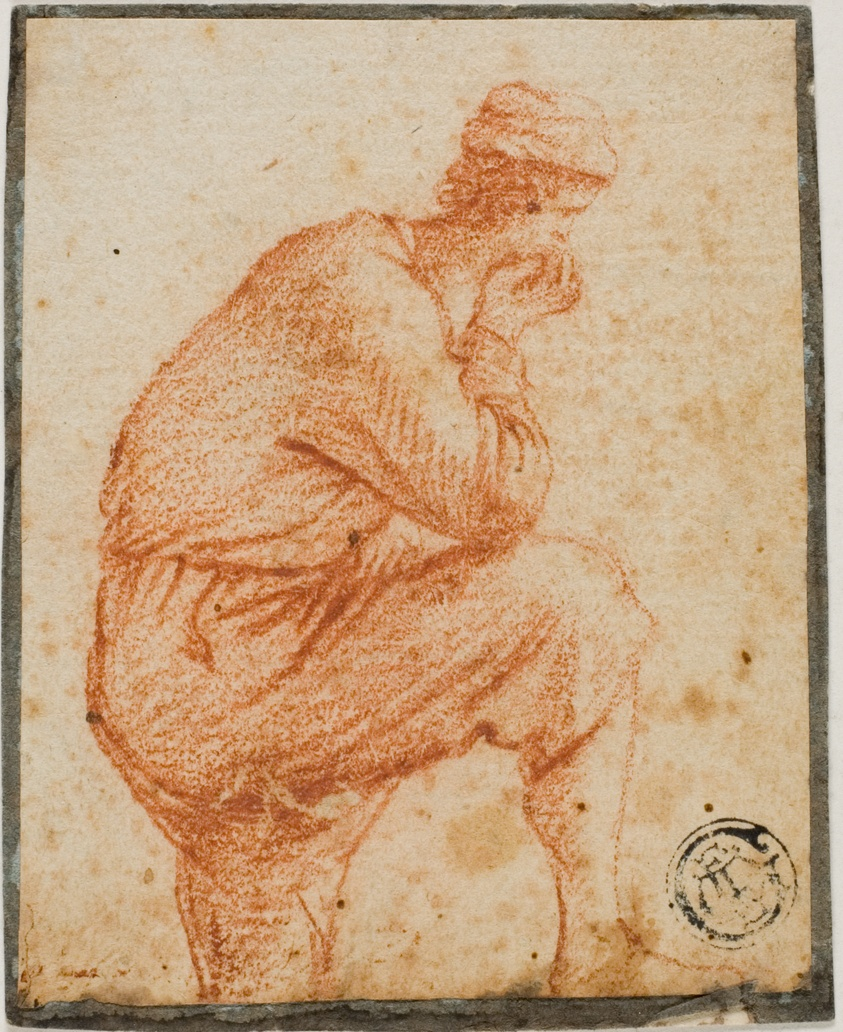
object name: Drawing and Watercolor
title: Young Man in Profile with Chin in Hand, Leaning on Raised Knee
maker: Filippo Napoletano (Italian, 1587/89-1629)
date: 1607-1629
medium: Red chalk, on ivory laid paper, laid down on cream wove paper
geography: Italy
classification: chalk; drawings (visual works); prints and drawing